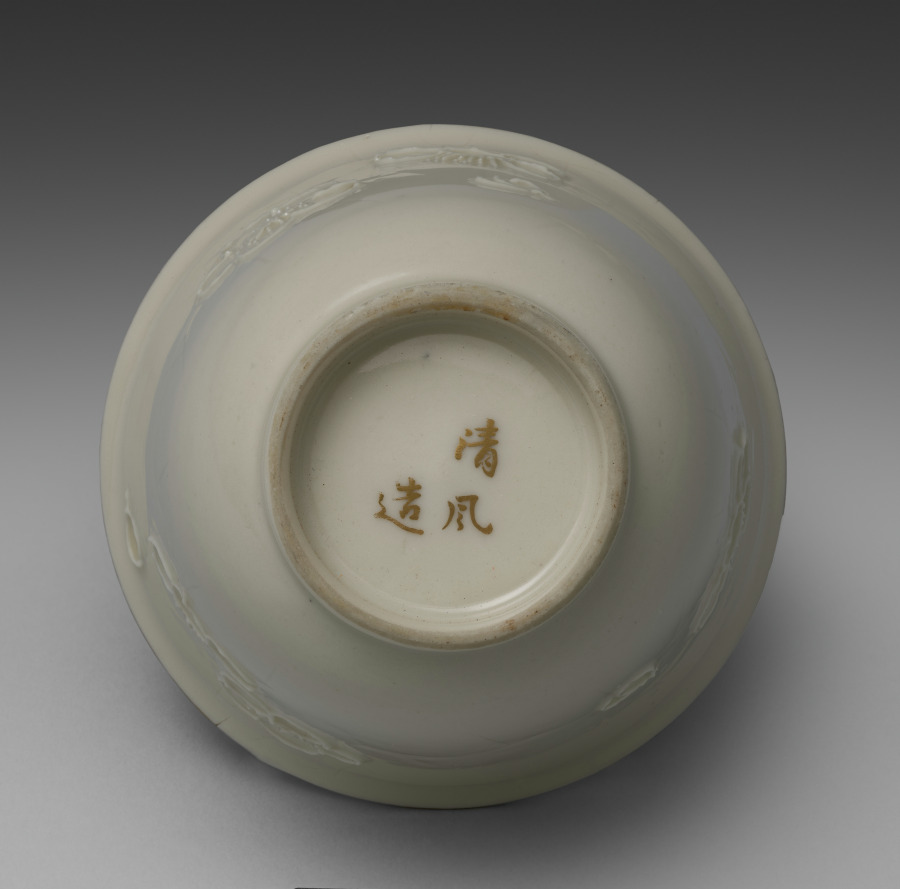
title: Drinking Cup from Dining Set with Plum Blossoms and Cracked-Ice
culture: Japan, Meiji period (1868–1912)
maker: Seifū Yohei II (Japanese, 1844–1878)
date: c. 1875–78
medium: Porcelain with molded designs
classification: Ceramic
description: Each item in this set has a delicate low-relief design of flowering plum branches over scattered, intersecting lines meant to resemble the cracked-ice surface of a frozen body of water and is signed on the base in gold pigment. While Yohei II produced many fine works in underglaze blue, like those produced by Kiyomizu Shichibei, he also made works in quite different styles later in his career, from the early 1870 s. In 1873, he was appointed purveyor to the Industrial Center of Kyoto Prefecture, a designation associated with Kyoto’s efforts to reach an international market through the port of Kobe; and from 1875 until his death, he was involved in national-level projects to present Japanese ceramics across the world. It was during this period that Yohei III was apprenticed to Yohei II, and it has been suggested that this set may in fact be an early example of Yohei III’s work, which he signed with his teacher’s name. Decorated with flowers resembling Japanese textile motifs, the set calls to mind the design of Yohei II’s pair of vases with plum blossoms in the Victoria and Albert Museum. Here, the elaborate trees created for a formal public exhibition setting have been translated into the approachable blossoms of the genteel domestic environment. While the designs are consistent across the pieces, each raised flower petal and pistil and each incised line in the ice was done by hand, so the cups, bowls, and dishes are similar yet unique. The bottoms of two boxes once identified the set’s owner, but the information has been deliberately obscured with black ink. However, inscriptions still visible appear to indicate two occasions, once at the end of July 1886 , and once again in June 1916 , when parts of the set were requested from Hokura in Niigata Prefecture. The location corresponds to a neighborhood in the present-day city of Jōetsu. The surname Tsuji 辻 also appears on a paper tag affixed to one of the box cloths. Future research may possibly reveal more about their provenance. A vase by Yohei III in a private collection combines the formal grandeur of the Yohei II vases in the Victoria and Albert Museum with the gentler design of this dining set, placing flowering plum trees against soft, scalloped-edge clouds resembling those in golden screens.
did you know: The dining wares have a creamy white coloration that the four boxes containing them identify as Korean in style.